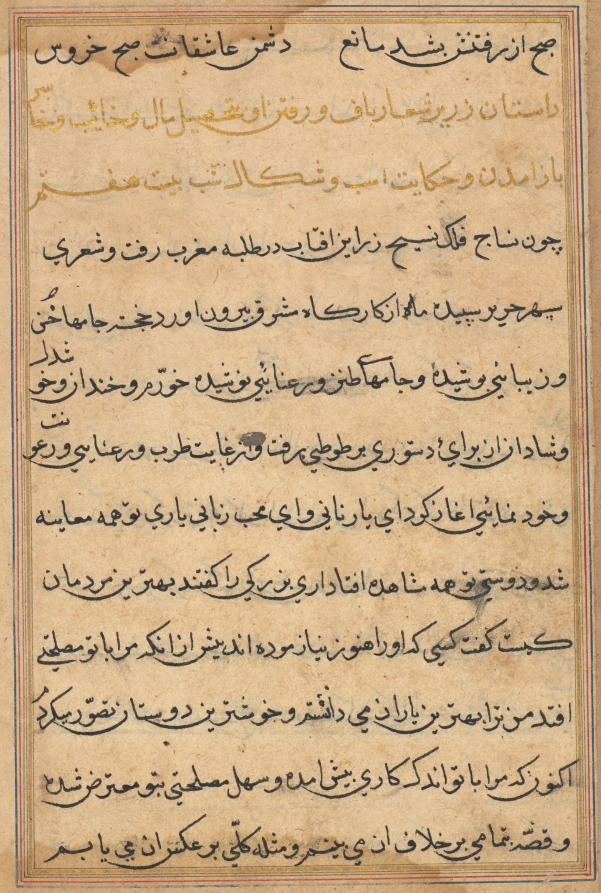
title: Page from Tales of a Parrot (Tuti-nama): text page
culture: Mughal India, court of Akbar (reigned 1556–1605)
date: c. 1560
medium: gum tempera, ink, and gold on paper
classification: Painting